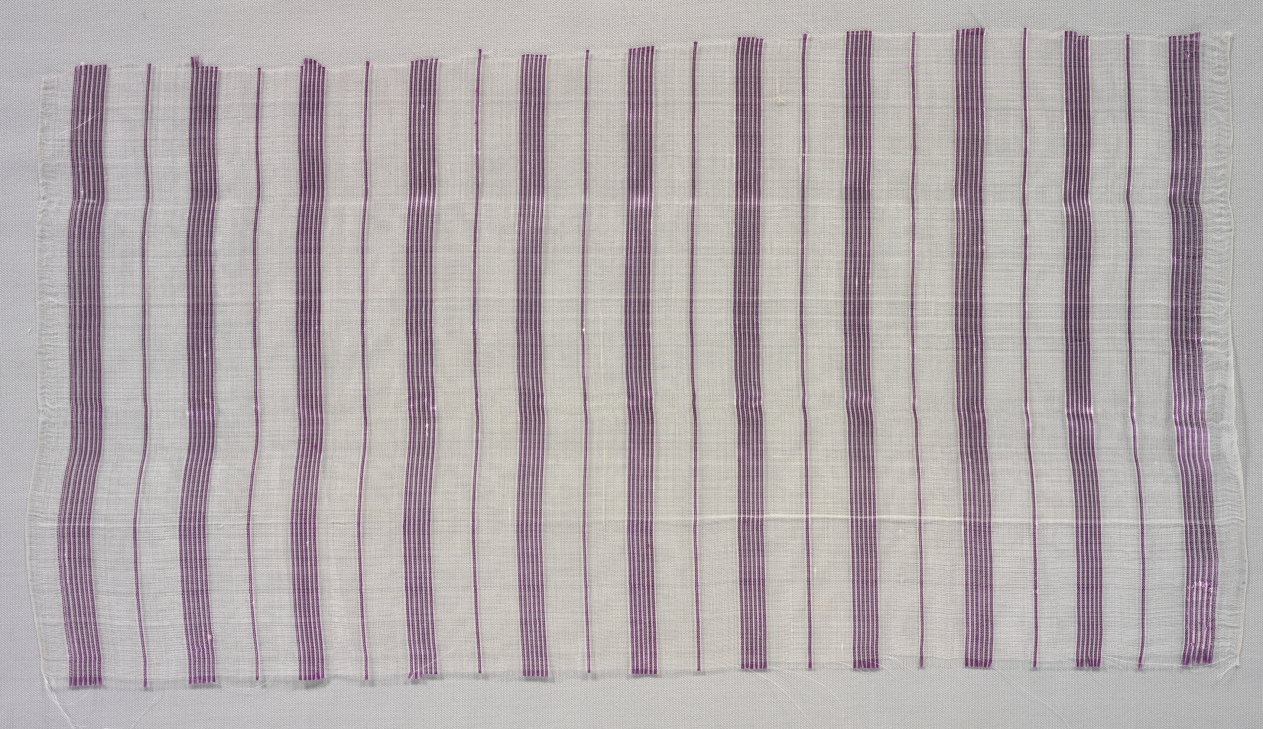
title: Piña cloth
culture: Philippines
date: mid-1800s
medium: piña fiber, silk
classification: Textile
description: This fabric is woven in plain weave using a piña ground with vertical bands of closely spaced silk warp stripes arranged in a repeating pattern. The stripes run the full length of the cloth.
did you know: Piña is made from the leaves of the pineapple plant, first brought to the Philippines by the Spanish in the sixteenth century.